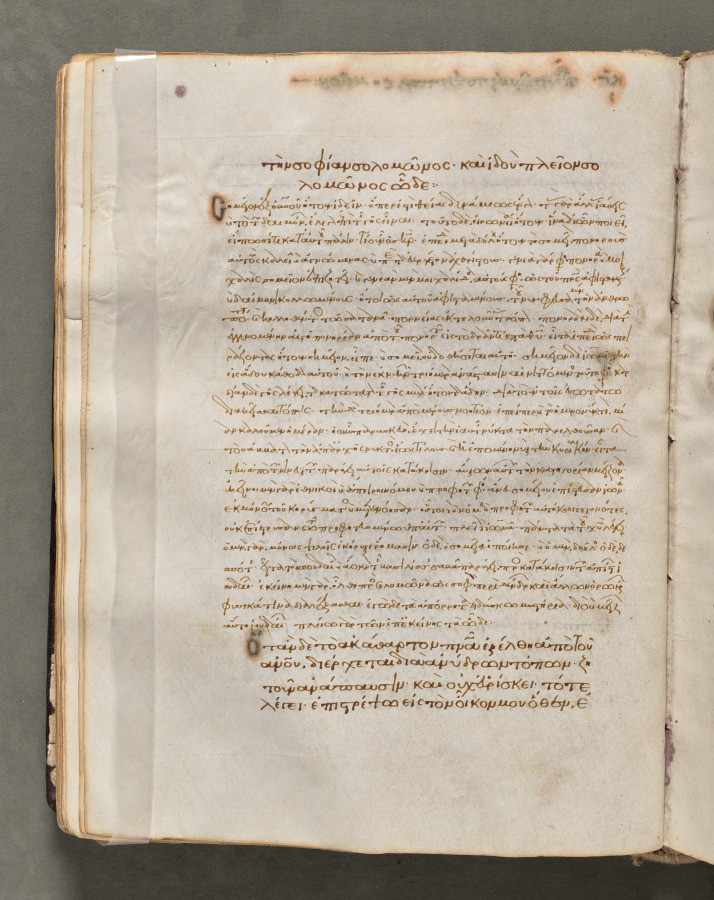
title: Text, folio 55 (verso), from a Gospel Book with Commentaries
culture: Byzantium, Constantinople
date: c. 1000–1100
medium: ink, tempera, and gold on vellum; leather binding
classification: Bound Volume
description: Each of the four gospels in this book opens on a page with brilliantly illuminated borders depicting the author of the text as well as birds-principally peacocks, symbols of the immortality of the soul-and fountains, representing the fountain of life and the salvation of the soul. This volume consists of 428 leaves with texts in Greek. Its level of sophistication suggests that it was probably written and decorated in a monastery in Constantinople.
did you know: Gospel Books were carried in procession through Byzantine churches.